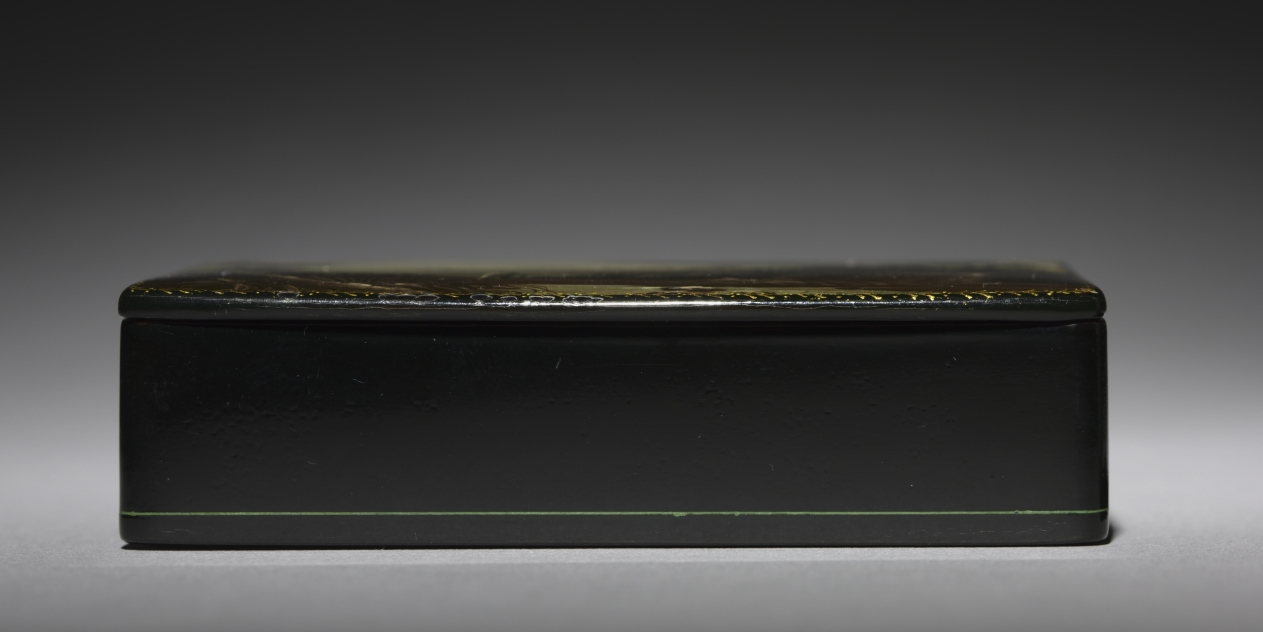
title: Snuff Box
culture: Russia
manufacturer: Lukutin Factory (Russian, 1818–1904)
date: 1800s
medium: wood with black lacquer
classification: Miscellaneous